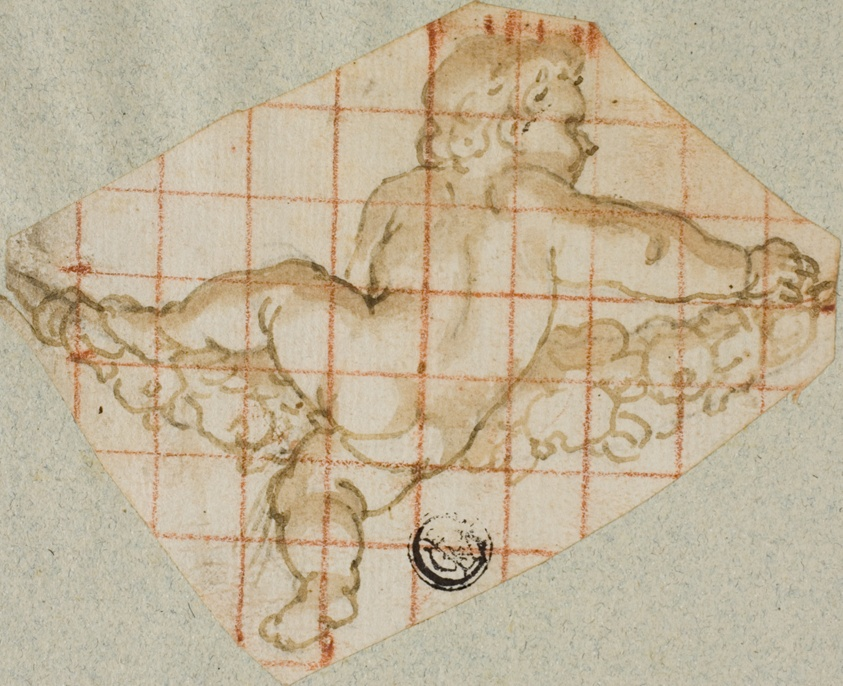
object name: Drawing and Watercolor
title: Putto with Garland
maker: Andrea Lilio (Italian, 1555-1642)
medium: Pen and brown ink with brush and brown wash, squared in red chalk, on ivory laid paper, laid down on blue laid paper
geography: Italy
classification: drawings (visual works); prints and drawing